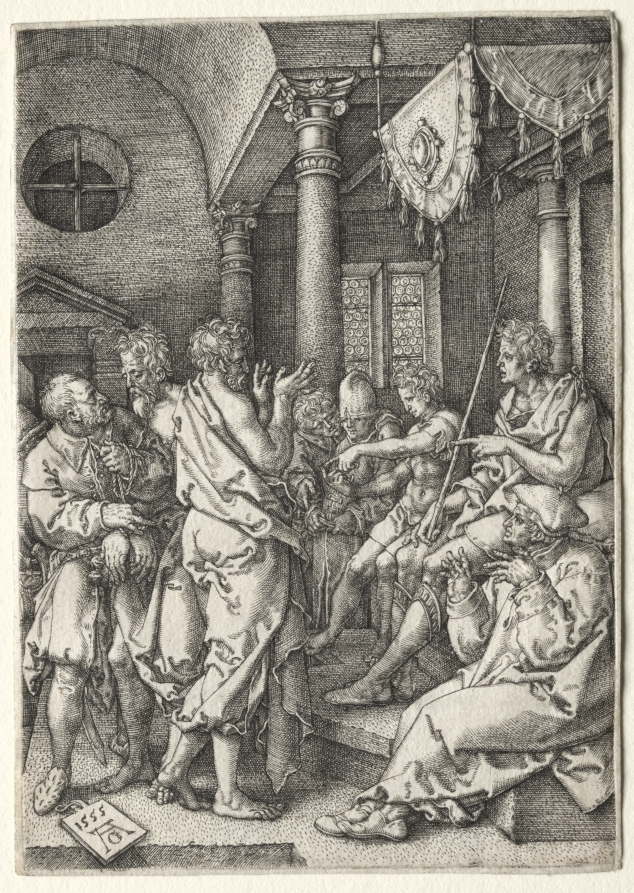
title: The Story of Susanna: Daniel Cross-Examining the Elders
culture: Germany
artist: Heinrich Aldegrever (German, 1502–1555/61)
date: 1500s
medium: engraving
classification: Print